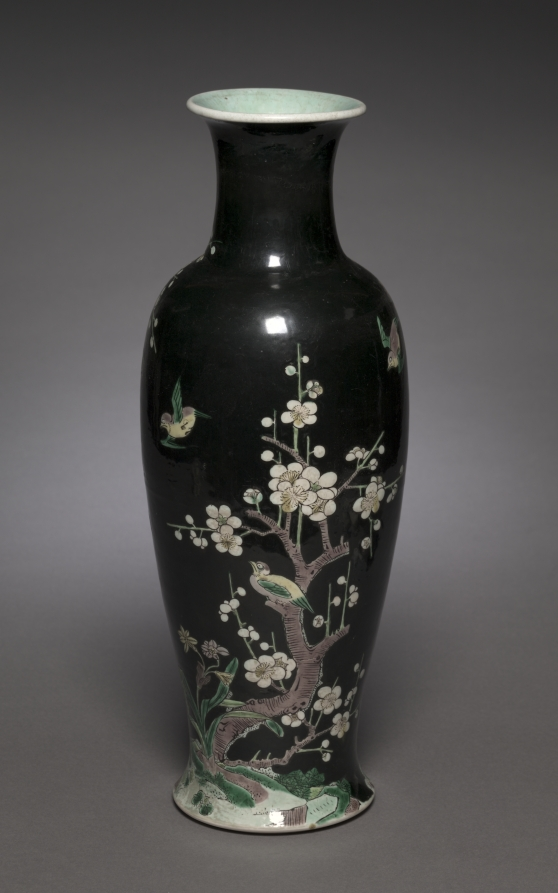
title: Baluster Vase with Blossoming Cherry Tree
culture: China, Qing dynasty (1644-1911), Kangxi reign (1662-1722)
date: 1714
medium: porcelain with polychrome enamel decoration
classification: Ceramic